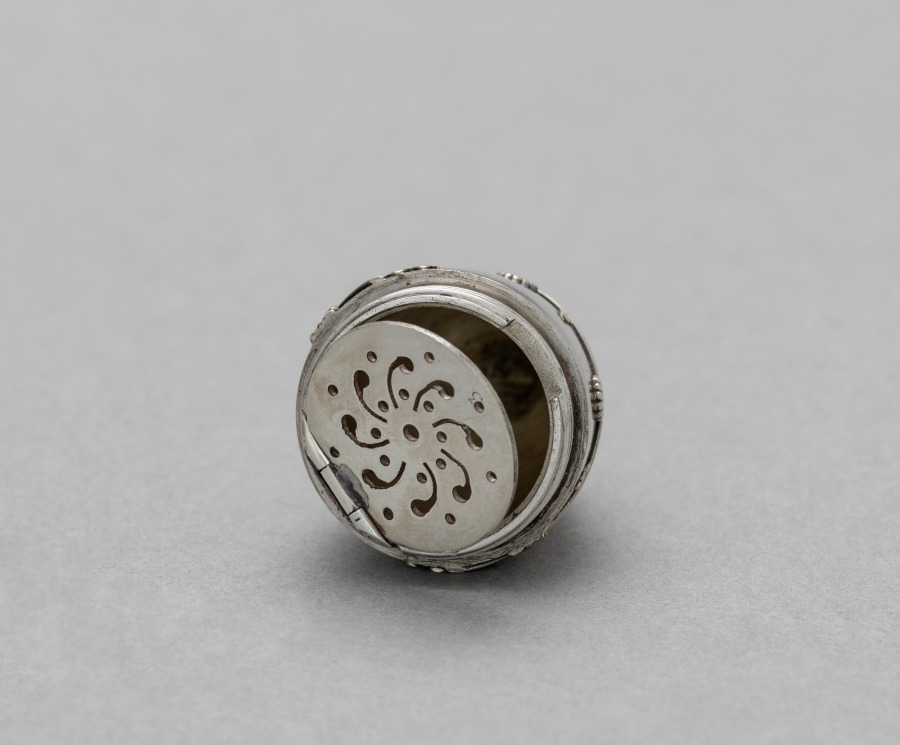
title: Container for Smelling Salts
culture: America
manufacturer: Tiffany & Co. (America, New York, est. 1837)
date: c. 1860–70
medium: silver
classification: Silver